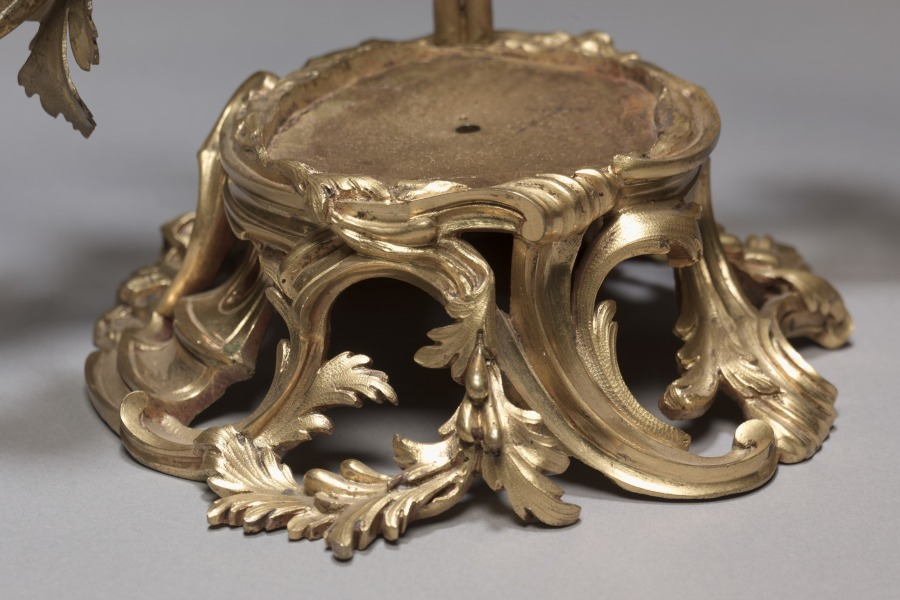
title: Candelabrum with Parrot (Candelabrum)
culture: France, style of Louis XV, 18th century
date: c. 1750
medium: gilt bronze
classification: Furniture and woodwork